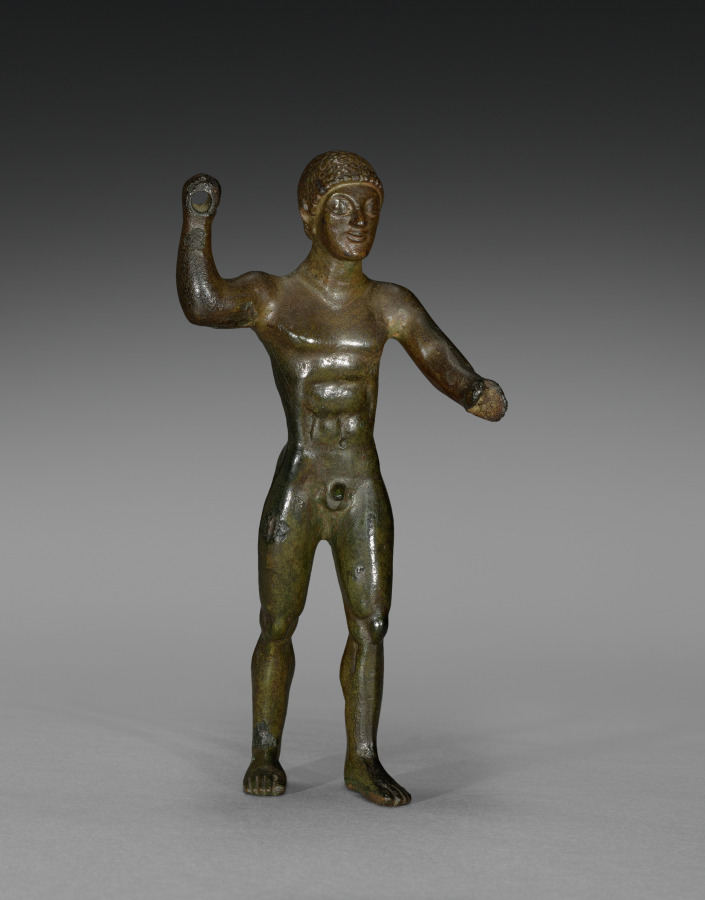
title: Statuette of a Young Spearman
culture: Etruscan, Archaic Period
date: late 500s BCE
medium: Bronze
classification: Sculpture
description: This small bronze statuette depicts a male figure in the act of throwing. Solid cast, he strides forward with his left foot while holding his left arm to the front and raising his right arm beside his head. The pierced right hand once held a separately made projectile, either an athlete’s javelin or a warrior’s spear (perhaps with a shield held on the left). The nude figure, with its well-defined musculature and finely modeled face and hair, exhibits a developed understanding of the human form.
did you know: This figure probably once held a spear or javelin in his raised, pierced right hand.